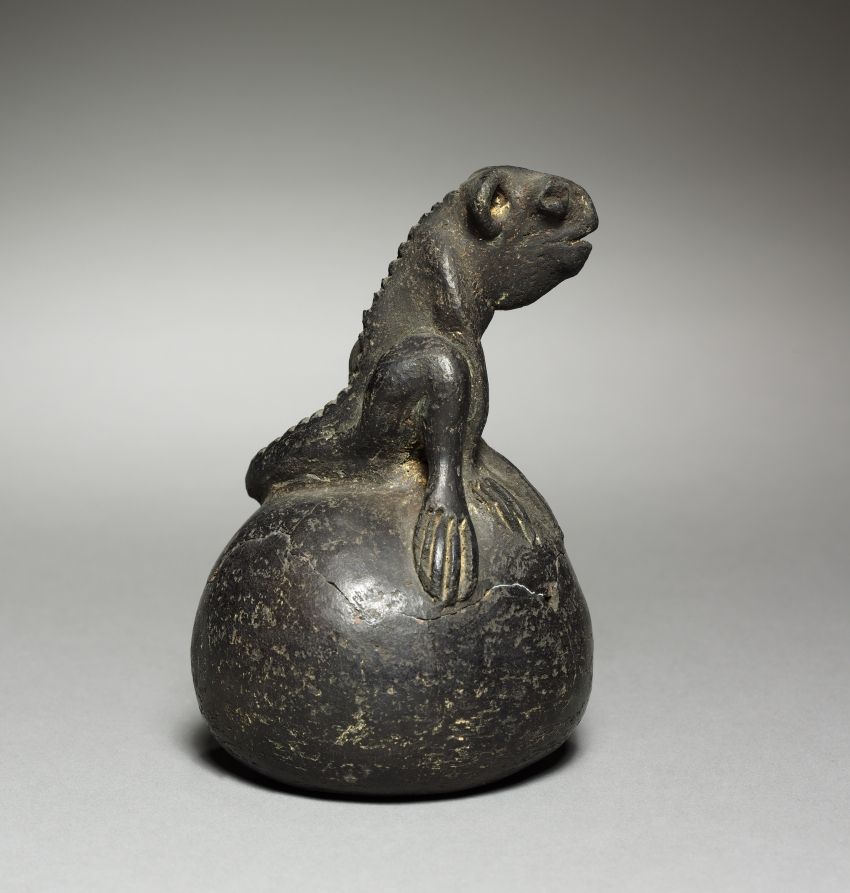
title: Figurine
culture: Colombia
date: before 1921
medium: pottery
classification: Ceramic